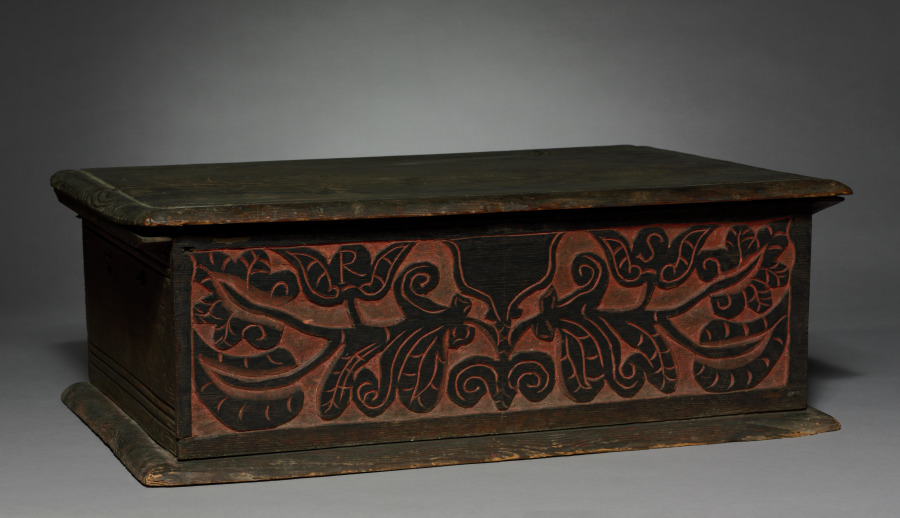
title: Carved Box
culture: America, late 17th century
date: 1680–1700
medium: oak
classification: Wood